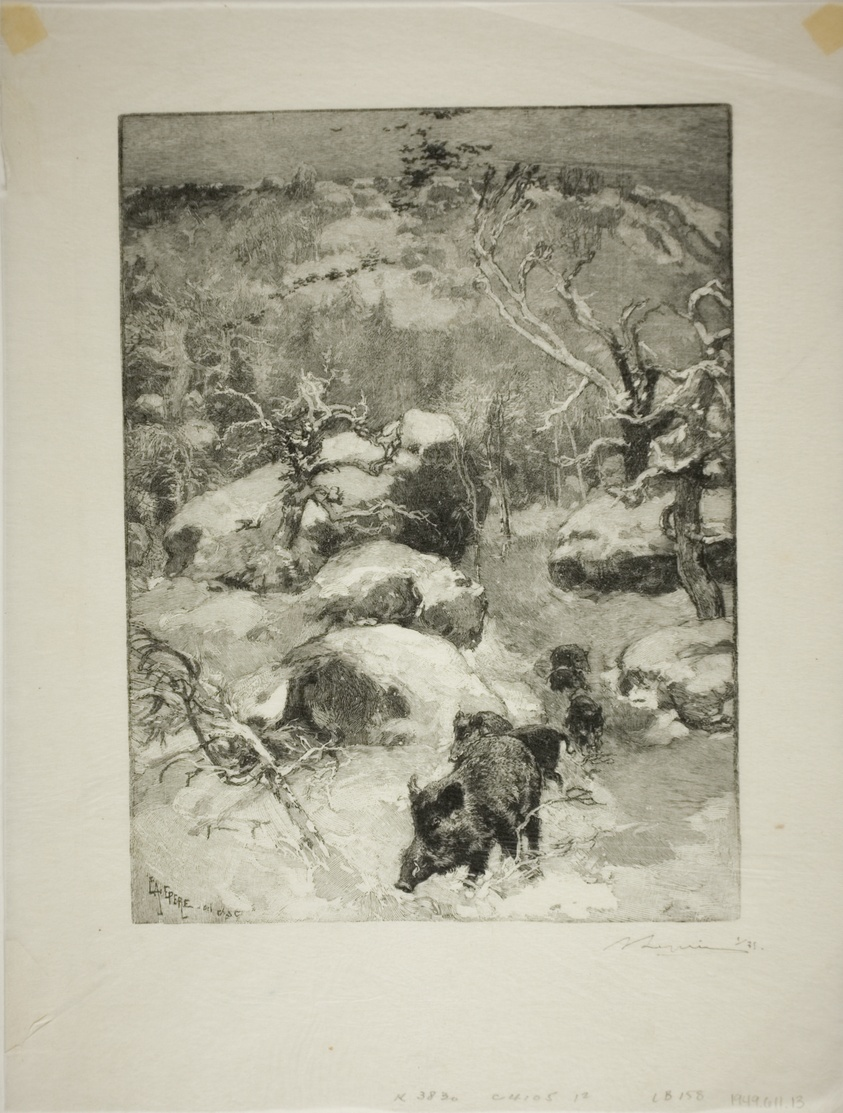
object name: Print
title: Winter: Cuvier-Châtillon Cliff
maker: Louis Auguste Lepère (French, 1849-1918); published by A. Desmoulins (French, active c. 1908-1910)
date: 1887, published 1908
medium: Wood engraving in black on cream laid Japanese paper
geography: France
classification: wood engraving; print; prints and drawing